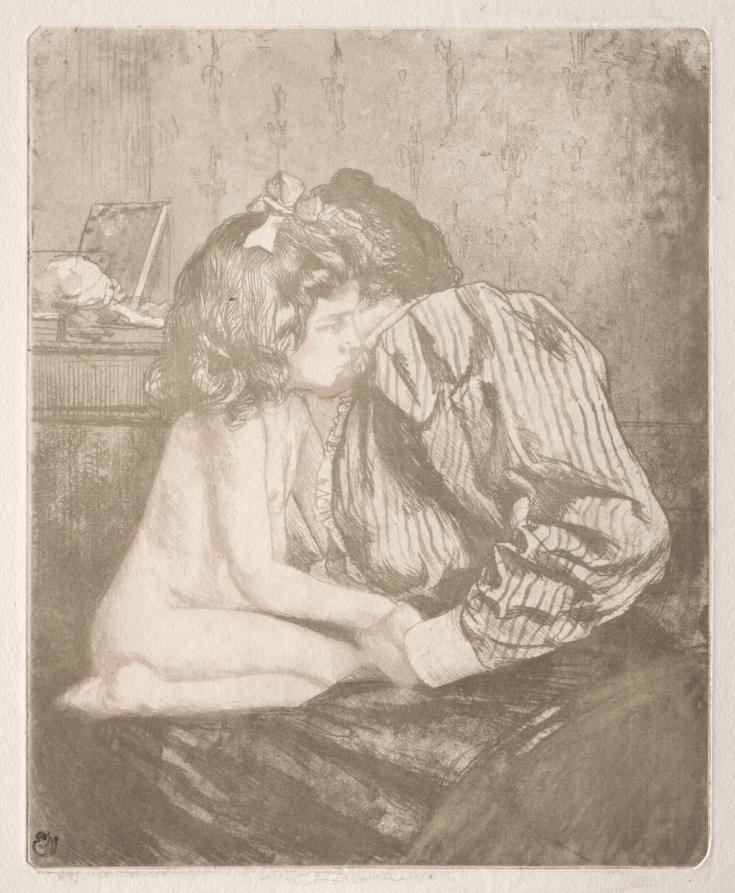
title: Confidences, from A New Sentimental Education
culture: France, 19th century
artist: Charles Maurin (French, 1856–1914)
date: 1901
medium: softground etching and aquatint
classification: Print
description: Charles Maurin's first color intaglio prints were made around the same time as Cassatt's extraordinary series of 10 color prints, and his subsequent graphic work owed a debt to her prints in both technique and subject. Later, he made two suites of prints, A Sentimental Education, 1897, and A New Sentimental Education, 1901, both of which were described as depicting "a mother attentive to the care of her child through the intimate details of daily life." Unlike Cassatt's cursory and abstracted drypoints of a mother and child like Reine and Margot Seated on a Sofa, Maurin surrounded his figures with domestic accoutrements. The charm of this subject is the rapt concentration with which the little girl listens to her mother, who whispers in her ear.